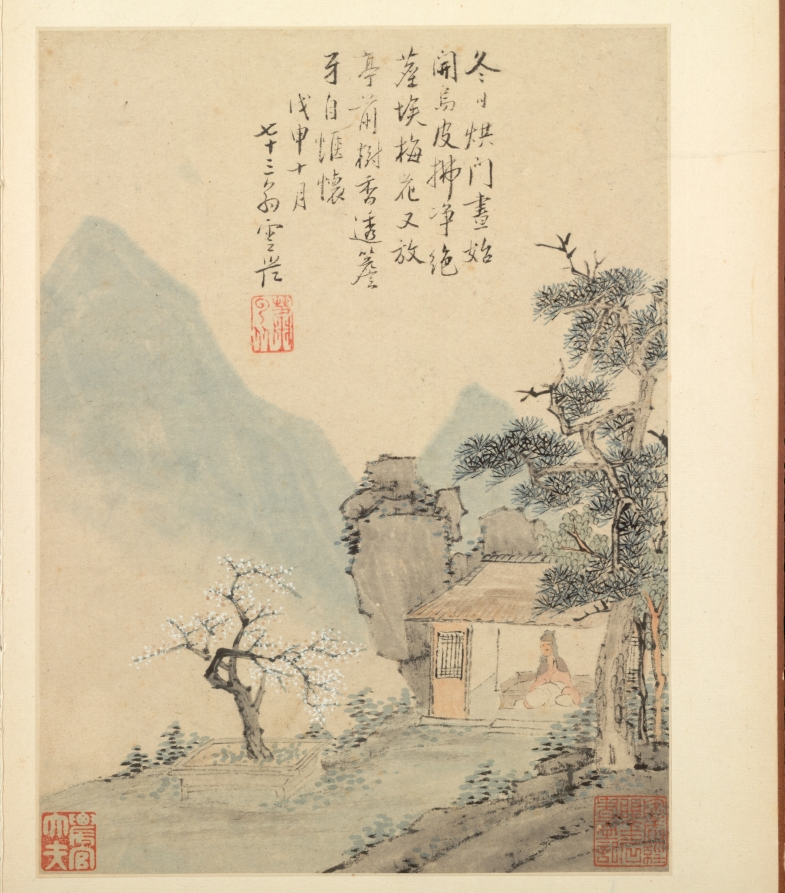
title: Album of Seasonal Landscapes, Leaf H (previous leaf 8)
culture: China, Qing dynasty (1644-1911)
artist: Xiao Yuncong (Chinese, 1596–1673)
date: 1668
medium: album leaf; ink and light color on paper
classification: Painting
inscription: Artist's inscription, signature, and 8 seals: Leaf H. When the winter sun warms up the door, the day begins;/ I clean up my black leather shoes to break off from the dusty world./ Prunus blossoms again bloom on the tree in front of the pavilion;/ Their fragrance penetrates the eaves and satisfies my innermost self. In the wushen year [1668], tenth month, the old man of seventy-three, Yuncong. [seal] Xiao Yuncong.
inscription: 9 additional seals: 2 of Chen Yixi 陳奕禧 (1646-1709); 4 of Li Yufen 李玉棻 [Li Yunhu 李韵湖] (active mid-1800s); 3 unidentified.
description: Throughout his lifetime, Xiao Yuncong visited Nanjing and Yangzhou, cities embedded in the fertile and water-rich Jiangnan region, as reflected in his paintings. Xiao painted from nature, and his landscapes are informed by the seasons and his travels, as well as by his experience as a print designer. Xiao’s fresh, light colors continue to appear in later Shanghai school paintings. This album was formerly in the collection of Li Yufen in Yangzhou and then owned by Wu Hufan in Shanghai. While the artist impressed his seal consistently below his poetic inscriptions in the upper parts of the composition, the red seals on the margins and in the lower corners of the paintings are impressions by the album’s previous owners.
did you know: The hardy white prunus blossoms in the poetic inscription and the painting itself identify this as a late winter scene.